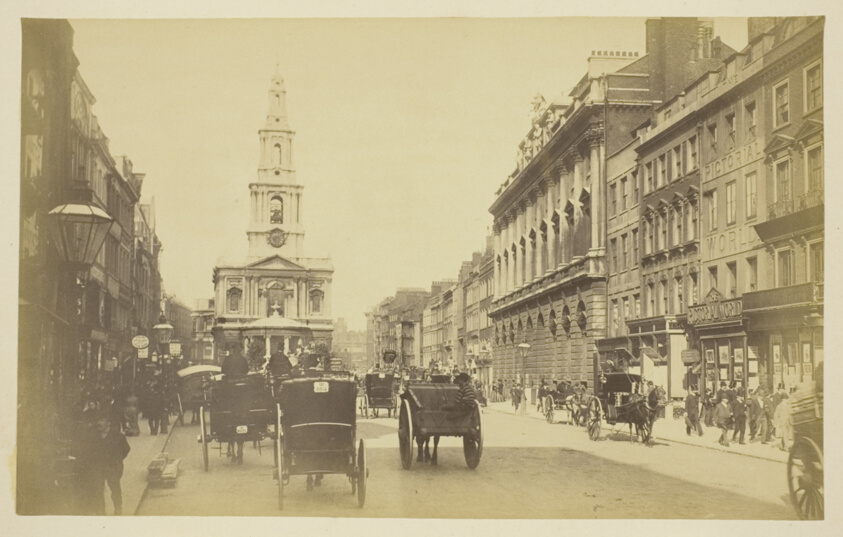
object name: Photograph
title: The Strand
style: 19th century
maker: Artist unknown; probably English, 19th century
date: 1850–1900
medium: Albumen print, from the album "Views of London"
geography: England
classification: albumen silver print; photographic process; photography; photograph